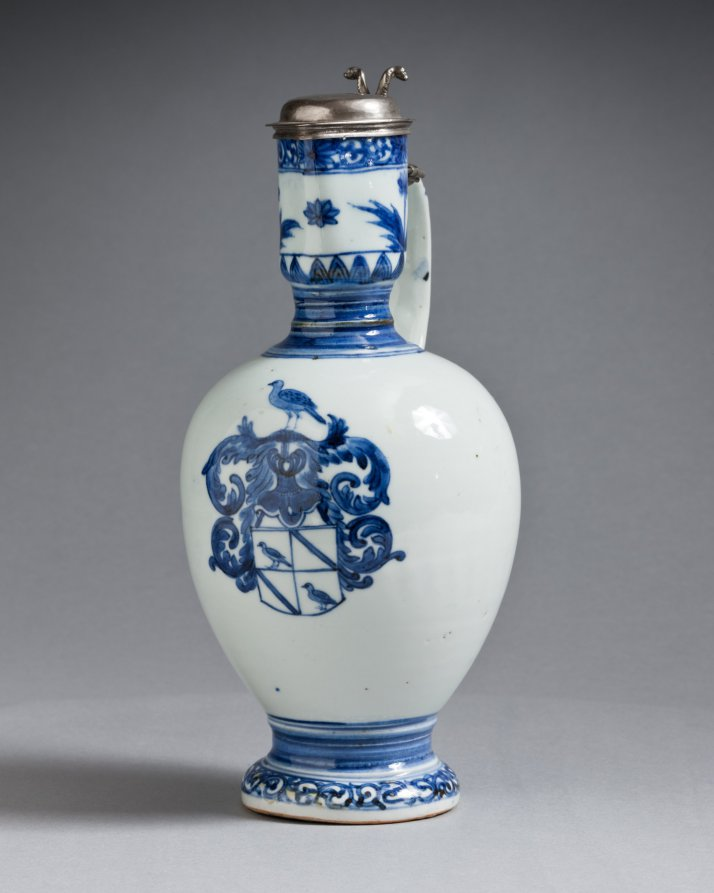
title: Jug with Silver Mounts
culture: Japan, Edo period (1615–1868)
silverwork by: Barent van Leeuwen (Dutch, 1637–1682)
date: c. 1662–76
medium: porcelain with underglaze blue decoration and silver mounts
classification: Ceramic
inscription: [on silver]: town mark for Amsterdam; lion rampant crowned (alloy mark for 0-934 silver); d (date letter for 1666), maker's mark of Barent van Leeuwen.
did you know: The coat of arms on this jug are those of the Valckenier family, active in the Dutch East India Company.